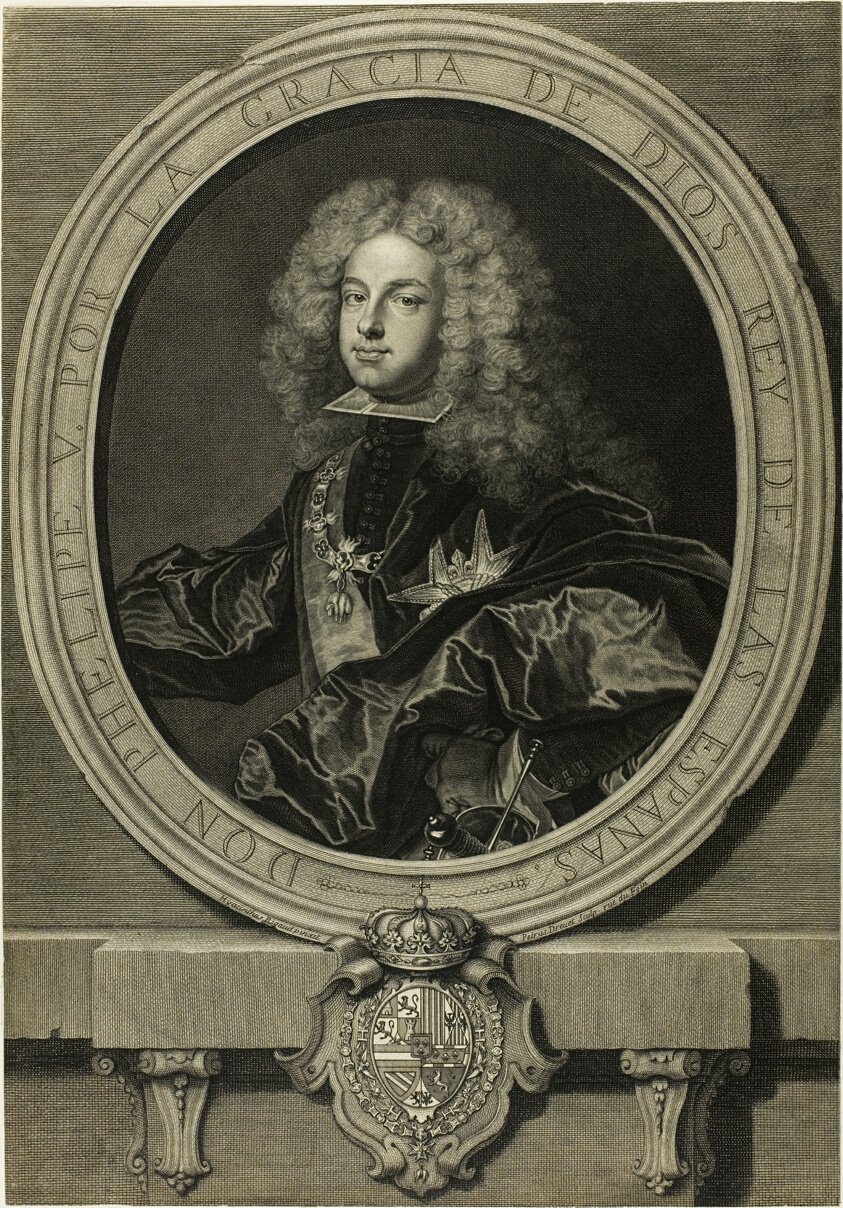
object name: Print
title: Portrait of Philippe V, King of Spain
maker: Pierre Drevet (French, 1663-1738); after Hyacinthe Rigaud (French, 1659-1743)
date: 1702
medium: Engraving on ivory laid paper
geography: France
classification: engraving; print; prints and drawing